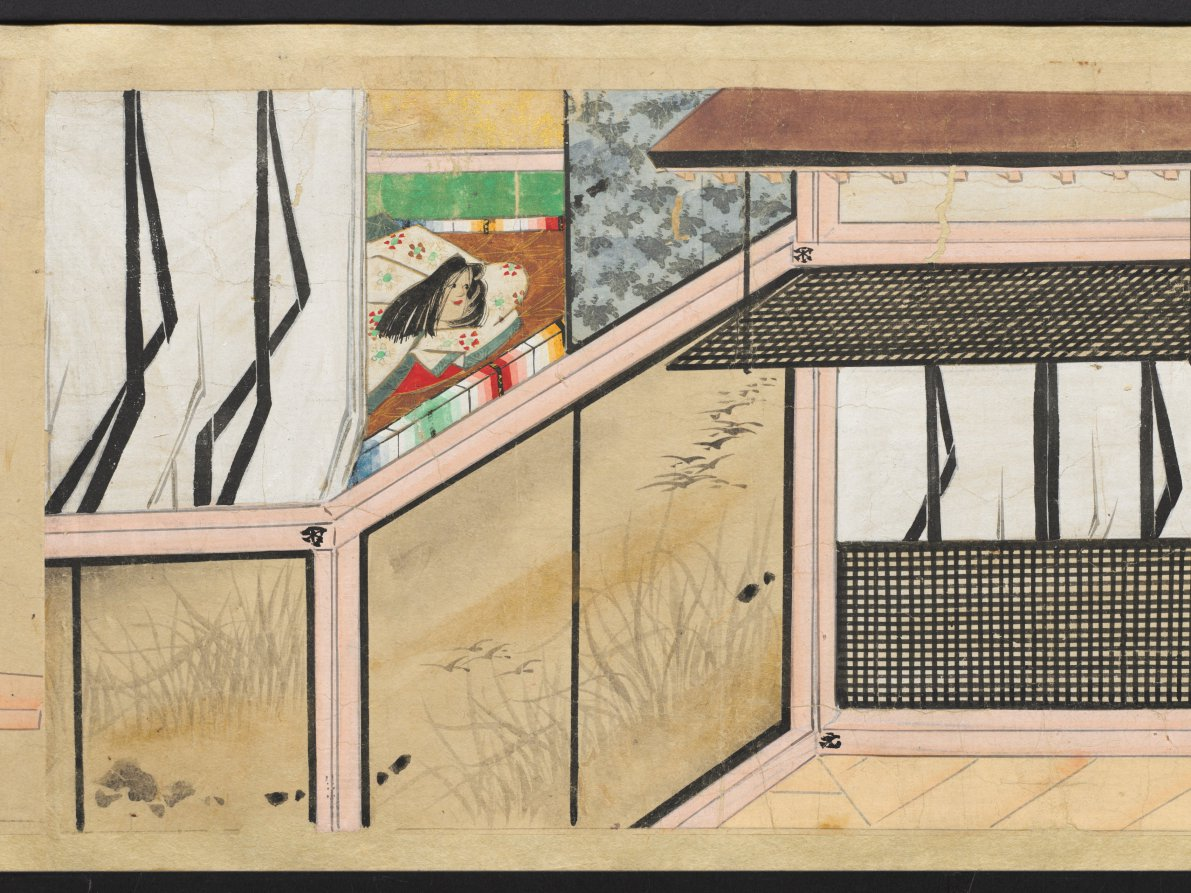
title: The Saltmaker's Story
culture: Japan, Edo period (1615–1868)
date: early 1600s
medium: One of a pair of handscrolls; ink, color, and gold on paper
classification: Painting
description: Once read and copied by girls at New Year’s celebrations and included in dowries, The Saltmaker’s Story is a rags-to-riches tale in which daughters are gifts from the gods. Despite his simple outlook, the main character progresses from humble roots as an associate at Kashima Shrine to the elite status of grandfather of the emperor through the intervention of the Kashima deity. The Saltmaker’s Story is traditionally presented in a set of three scrolls, but the text of this set has been removed by a previous owner, who remounted the illustrations as a pair. The paintings of this one take us from right to left through the second half of the tale.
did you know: This handscroll originally had texts before its paintings, but the texts were removed.